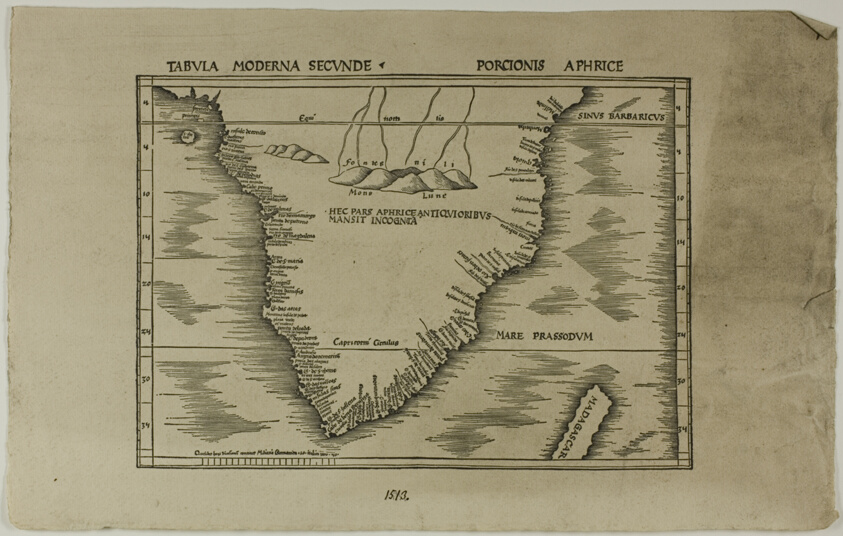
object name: Print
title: Tabula Moderna Secunde Porcionis Aphrice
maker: Unknown Artist; English, 19th century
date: 1513, reprinted 1889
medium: Woodcut in black on cream laid paper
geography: England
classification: reproduction; print; prints and drawing